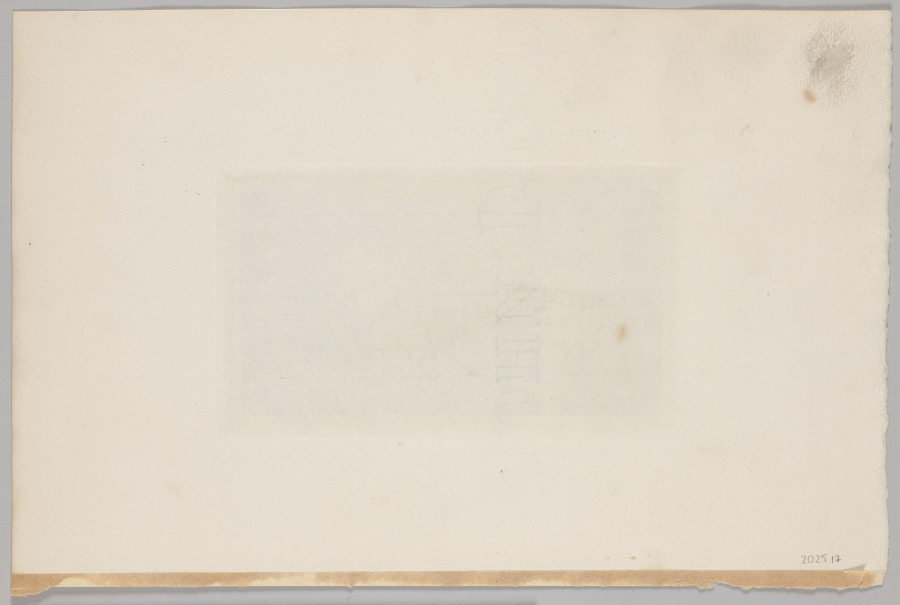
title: A Winter's Sunrise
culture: England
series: Marsh Leaves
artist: Peter Henry Emerson (British, 1856–1936)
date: before 1891, published 1895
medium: photogravure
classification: Photograph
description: Marsh Leaves, in which this image appears, was Emerson’s last book of photographs. Published in 1895, it is generally considered his best and most influential body of work. He had moved from naturalism to a graphic style so radical that it sometimes verged on abstraction. This looser, more expressionistic, and emotional late style helped lay the groundwork for Pictorialist photography, which dominated fine art photography in the early 20th century.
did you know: In 1886, the year after completing medical school, Peter Henry Emerson became a full-time photographer and published his first book of photographs.